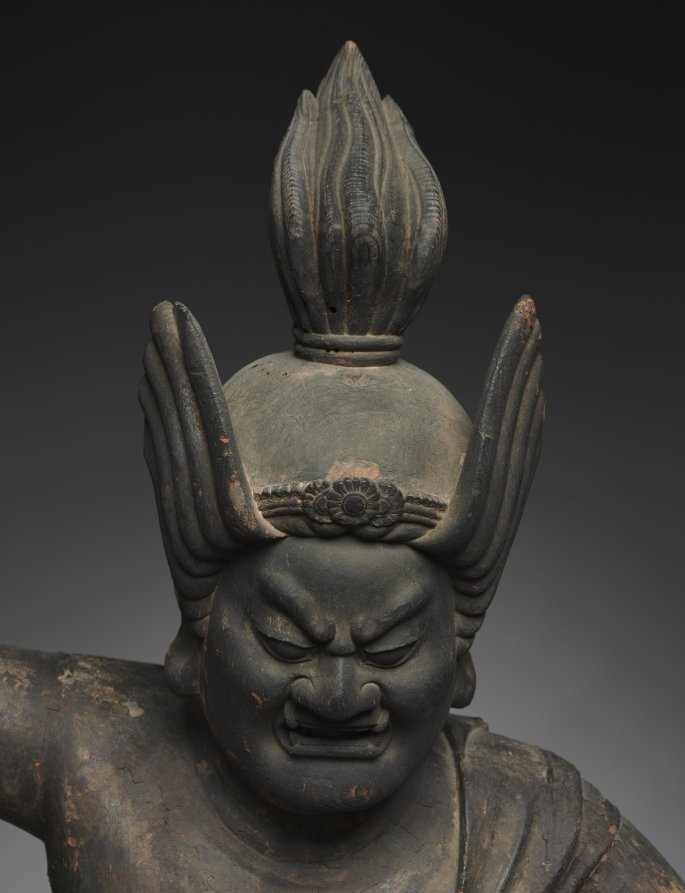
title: Zaō Gongen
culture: Japan, Kamakura period (1185–1333)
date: 1200s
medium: wood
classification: Sculpture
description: Zaō Gongen is the guardian deity of Mount Kinpu in Yoshino south of Nara. Zaō appeared at the behest of En no Gyōja, who prayed for a powerful protector of the mountain. The deity was described as a combined manifestation of the Buddha Shakyamuni, Thousand-Armed Kannon, and Miroku. These three deities were viewed as the past, present, and future protectors of the world. Zaō’s appearance derives from portrayals of fierce Buddhist deities.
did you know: Zaō Gongen wears the pelt of a large feline, the face of which is near his knee.